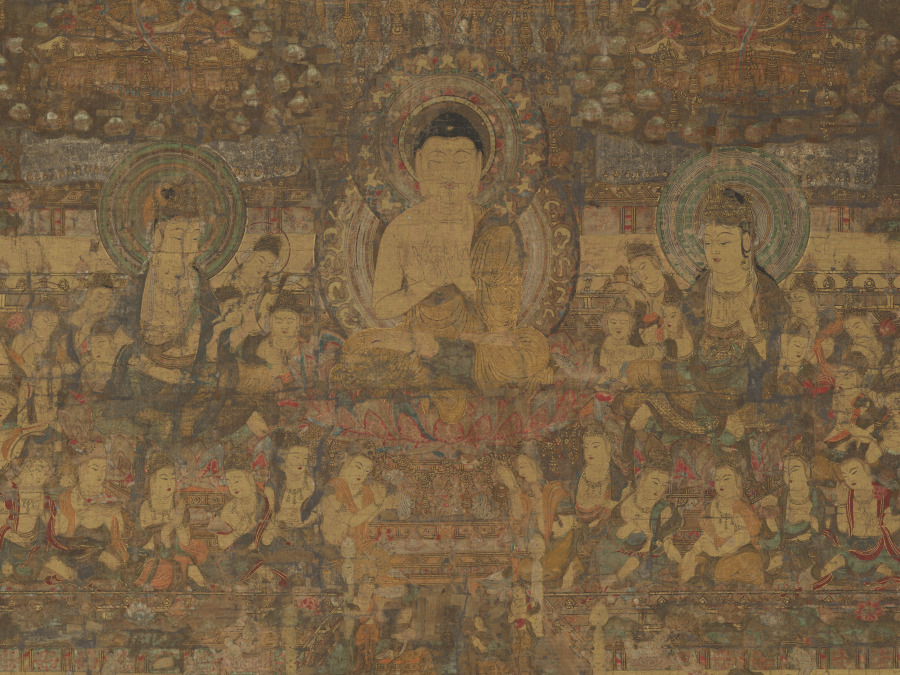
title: Taima Mandala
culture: Japan, Kamakura period (1185–1333)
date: early 1300s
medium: hanging scroll; ink, color, and gold on silk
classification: Painting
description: This painting is a copy after an 8th-century woven mandala belonging to the temple Taimadera. The composition is based on a sacred text that describes the Buddha Shakyamuni’s explanation of Amida’s Pure Land to Queen Vaidehi, as well as his instructions to her on visual meditation upon the Pure Land. The Pure Land appears at the center of the painting. To the left is the story of Queen Vaidehi’s encounter with Shakyamuni, and to the right are the scenes she is given to visualize. The bottom illustrates the nine levels of birth that can be attained in the Pure Land.